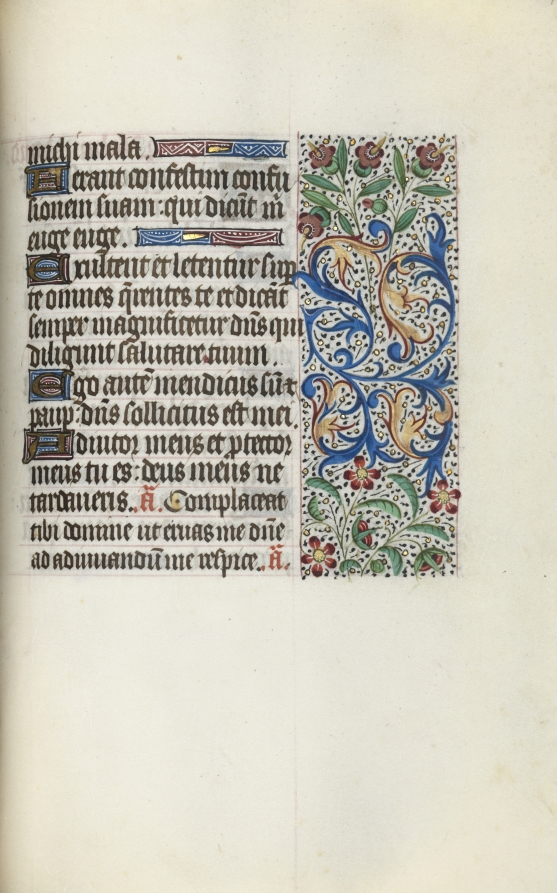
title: Book of Hours (Use of Rouen): fol. 127r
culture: France, Rouen, 15th century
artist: Master of the Geneva Latini (French, active Rouen, 1460–80)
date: c. 1470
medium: ink, tempera, and gold on vellum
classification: Bound Volume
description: In the late 1400s and early 1500s Rouen was an established and important center of book production. The city’s cathedral had a wealthy chapter that spent large sums of money to commission books and to maintain its extensive library. The stationers and booksellers would have likely been concentrated in or near the cathedral precinct. This artist, named after a manuscript now in Geneva, was Rouen’s principal illuminator during the second half of the 1400s.